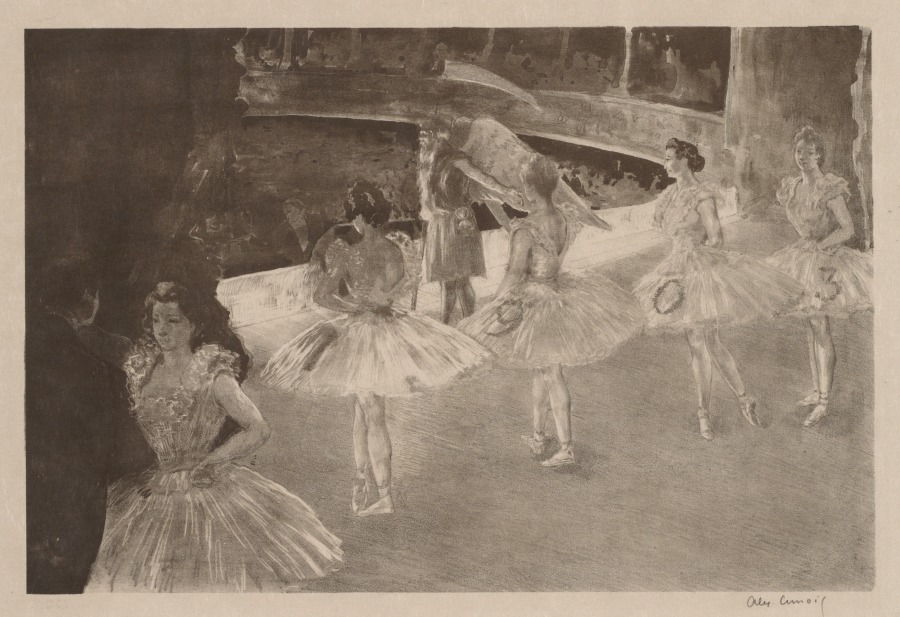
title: Le Ballet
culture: France, 19th-20th century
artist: Alexandre Lunois (French, 1863–1916)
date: 1898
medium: lithograph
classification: Print